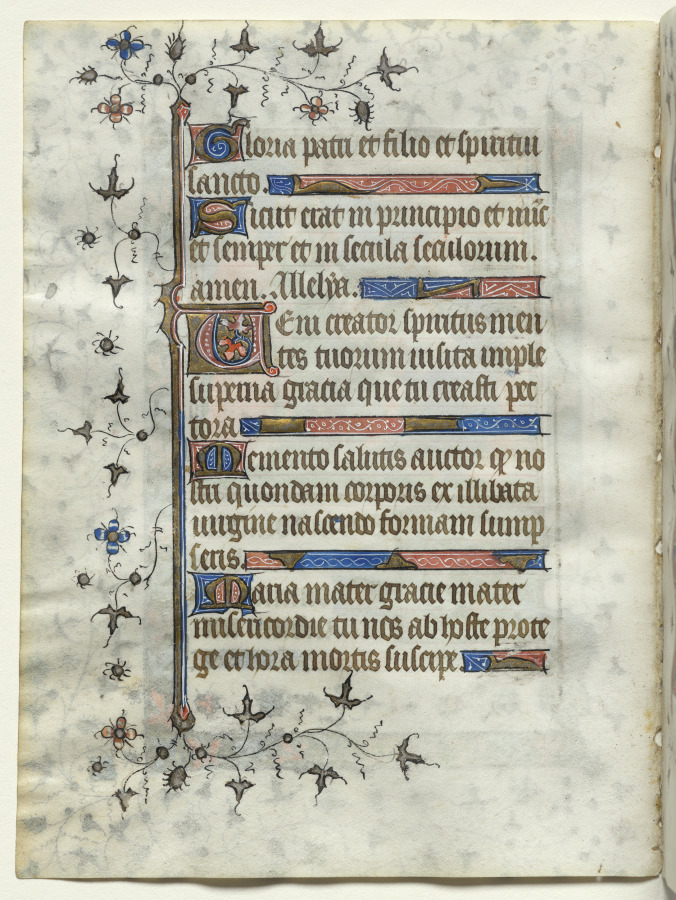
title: Bifolio from a Book of Hours: Text (verso)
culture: France, Paris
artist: workshop of Boucicaut Master (French, Paris, active about 1410–25)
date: c. 1415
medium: ink, tempera, and gold on vellum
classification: Manuscript